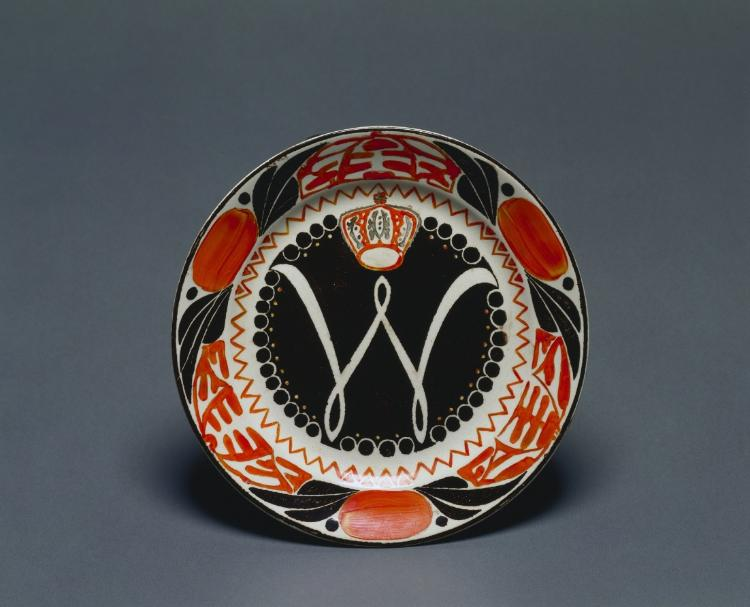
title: Plate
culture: Netherlands, Maastricht, 19th century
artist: Carel-Adolphe-Lion Cachet (Netherlandish, 1864–1945)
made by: Petrus Regout & Co., Maastricht (Netherlandish)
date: 1898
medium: earthenware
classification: Ceramic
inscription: Instribed on bottom: "HET VERHEUGO AMSTERDAM / AAN / ZIJNE KINDEREN / IN HULDIGING / 1898, L.C.INV. / {Sphinx}"